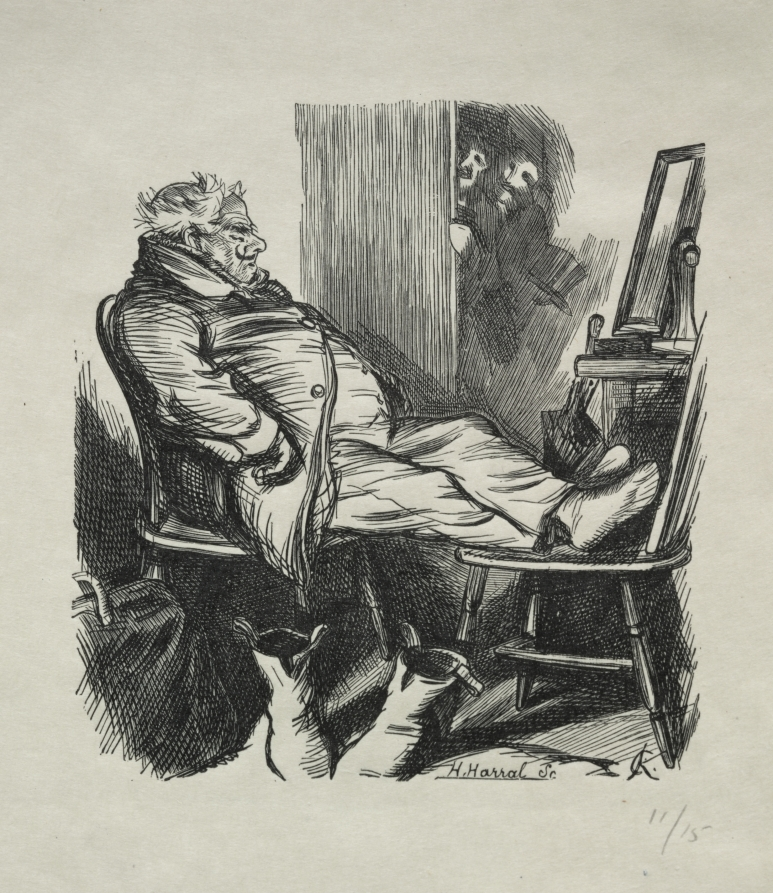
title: How I Lost My Whiskers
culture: England, 19th century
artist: Horace Harral (British, 1817–1905)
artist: after Charles Samuel Keene (British, 1823–1891)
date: 1866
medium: wood engraving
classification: Print